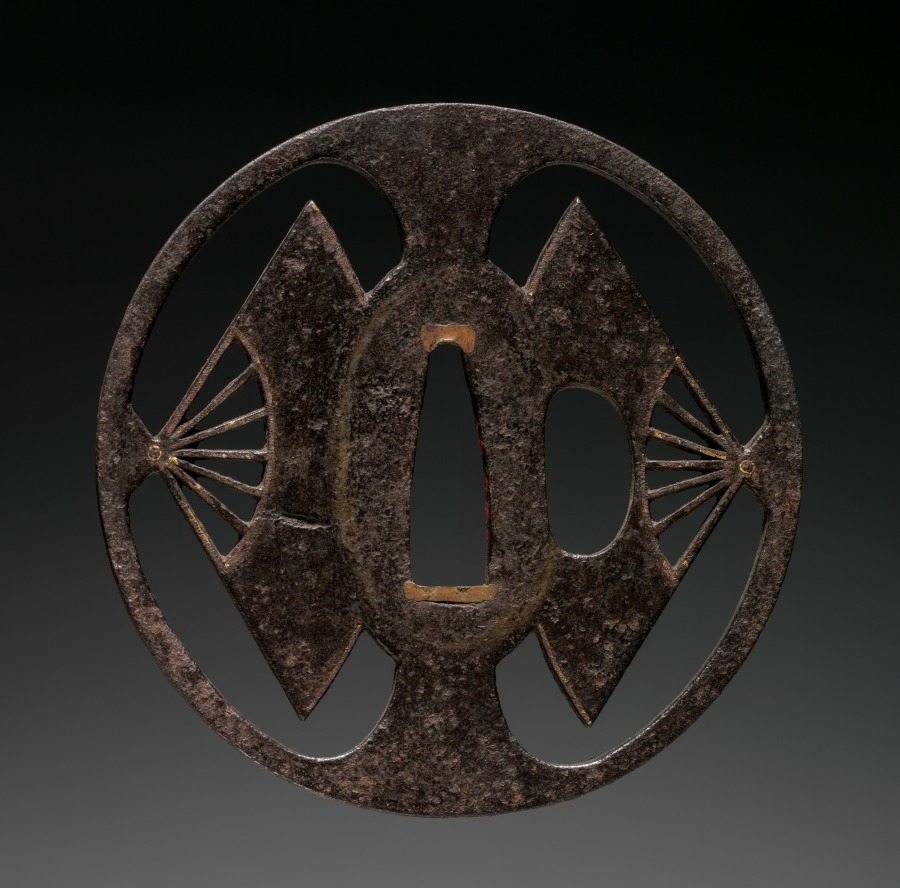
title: Sword Guard (Tsuba) with Fans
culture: Japan, Edo period (1615–1868)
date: 1615–1868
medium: iron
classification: Arms and Armor